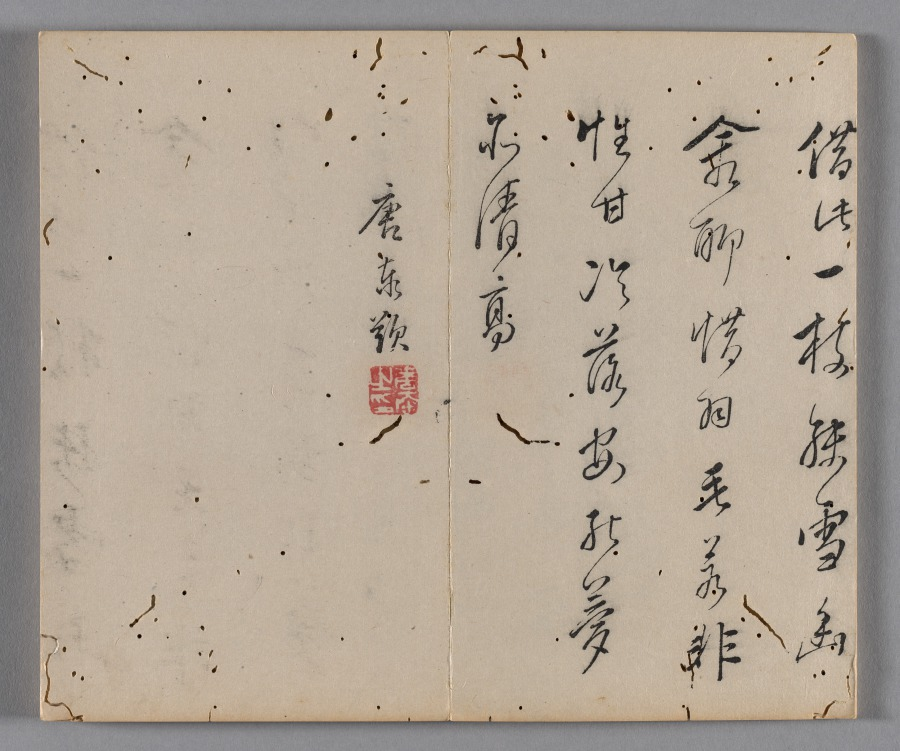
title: Ten Bamboo Studio Painting and Calligraphy Handbook (Shizhuzhai shuhua pu): Birds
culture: China, Qing dynasty (1644-1911)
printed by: Hu Zhengyan (Chinese, c. 1584–1674)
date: 1633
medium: Woodblock-printed book; ink and colors on paper; first edition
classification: Print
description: Color printing reached a level of perfection in the early 1600s, as seen in this Ten Bamboo Studio Collection of Calligraphy and Painting and the Mustard Seed Garden Manual of Painting (printed 1679 and 1701). The painterly quality, precision in registering (aligning) the woodblocks, and harmonious colors made them the most successful color print editions in Chinese history. Both editions were printed and compiled in Nanjing, spread nationwide, and had a great impact on the arts in Japan and Korea.